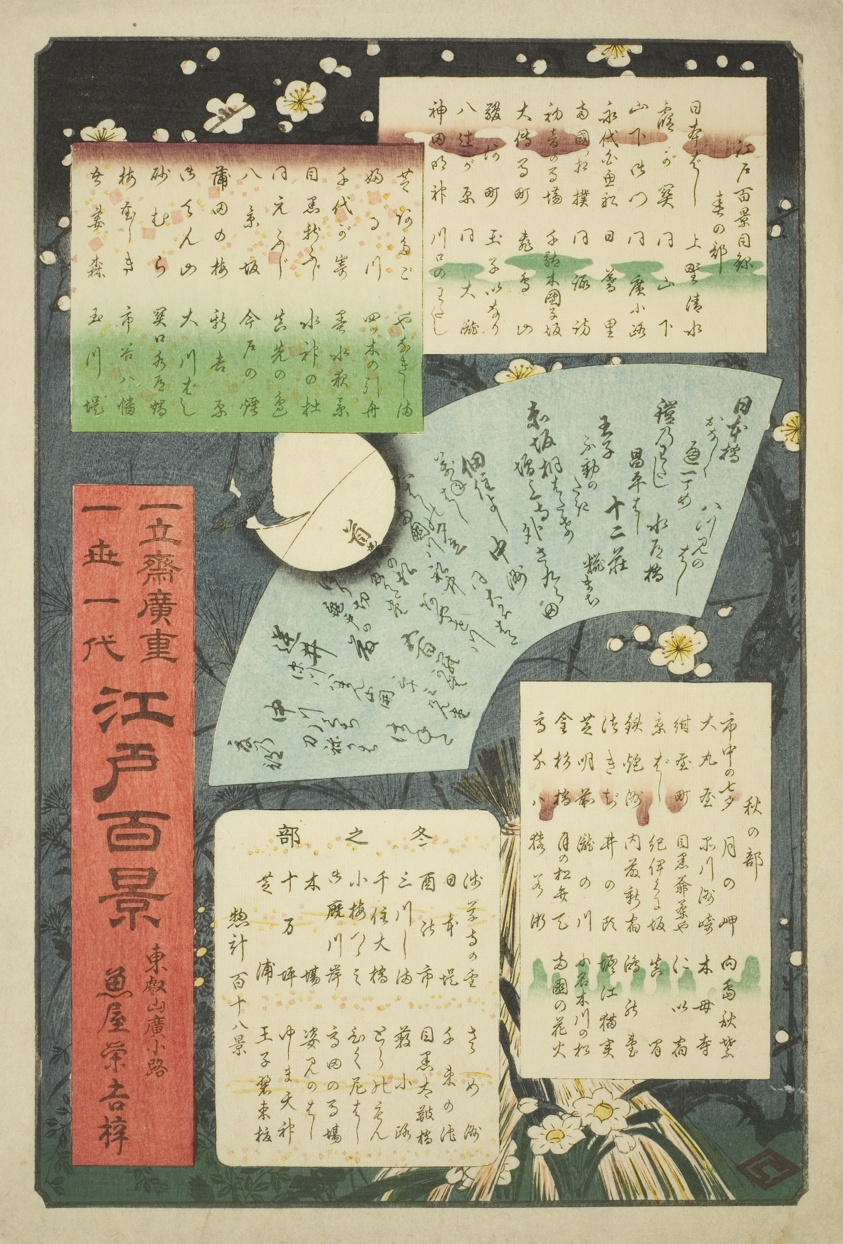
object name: Print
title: Title page and list of contents for "One Hundred Famous Views of Edo (Meisho Edo hyakkei)"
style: Japanese (culture or style)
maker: Baisotei Gengyo; Japanese, 1817–1880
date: c. 1858/59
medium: Color woodblock print; oban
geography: Japan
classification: woodblock print; print; asian art